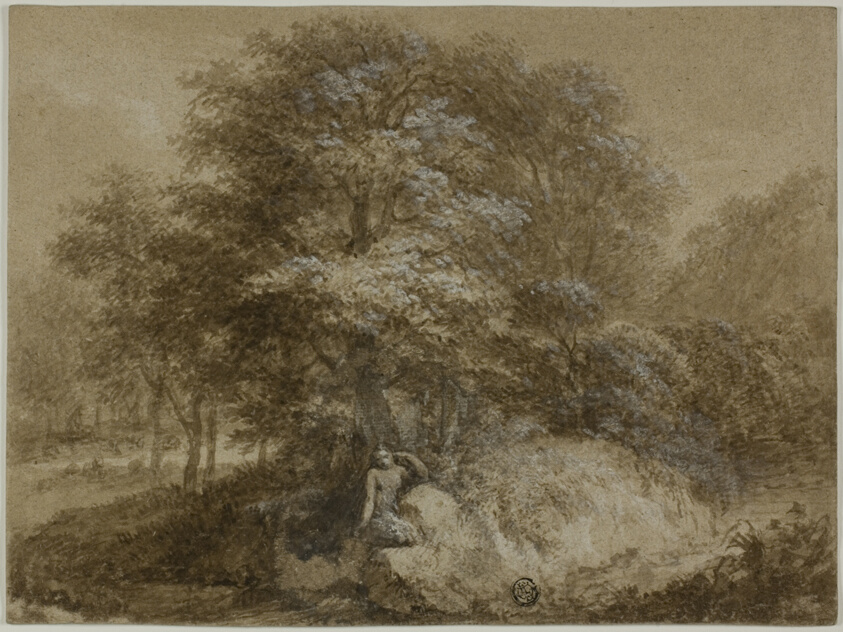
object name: Drawing and Watercolor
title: Shady Grove with Nymph Seated Under Tree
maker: Adam Friedrich Oeser (German, 1717-1799)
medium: Brush and brown wash, heightened with white gouache, on tan laid paper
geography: Germany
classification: ink or chalk wash; drawings (visual works); prints and drawing